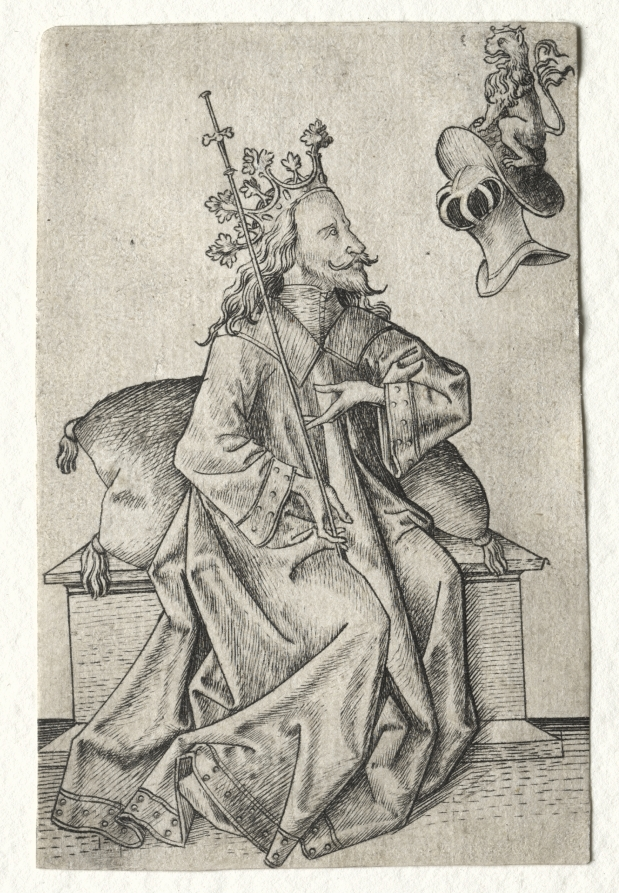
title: The Small Playing Cards: Second Suit: Helmets: Playing Card with King and Helmet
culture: Germany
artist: Master ES (German, active 1450–67)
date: 1450–67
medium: engraving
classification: Print